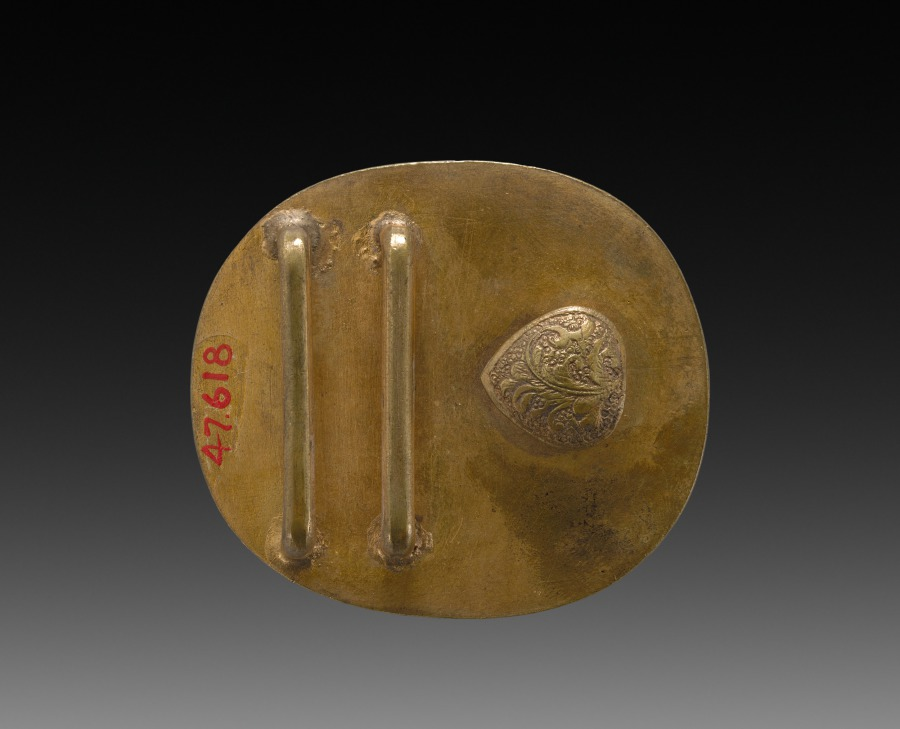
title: Buckle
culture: China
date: 1900s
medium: brass set with glass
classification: Jewelry